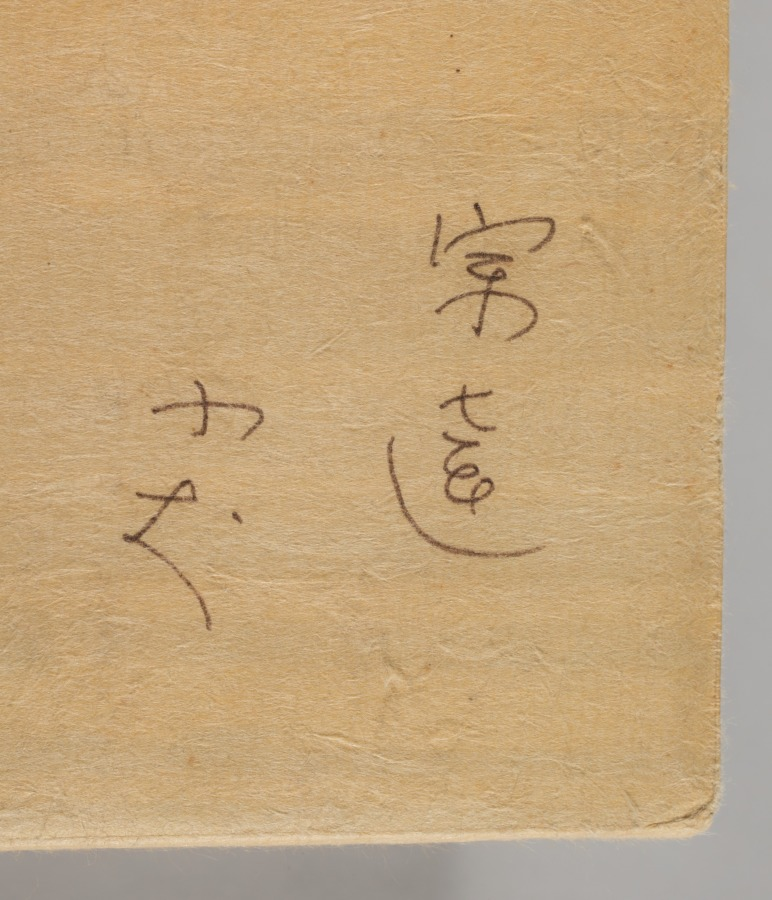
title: Puppy with Dandelions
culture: Japan, Edo period (1615–1868)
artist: studio of Tawaraya Sōtatsu (Japanese, c. 1570–c. 1640)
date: 1600–1640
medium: hanging scroll; ink on paper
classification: Painting